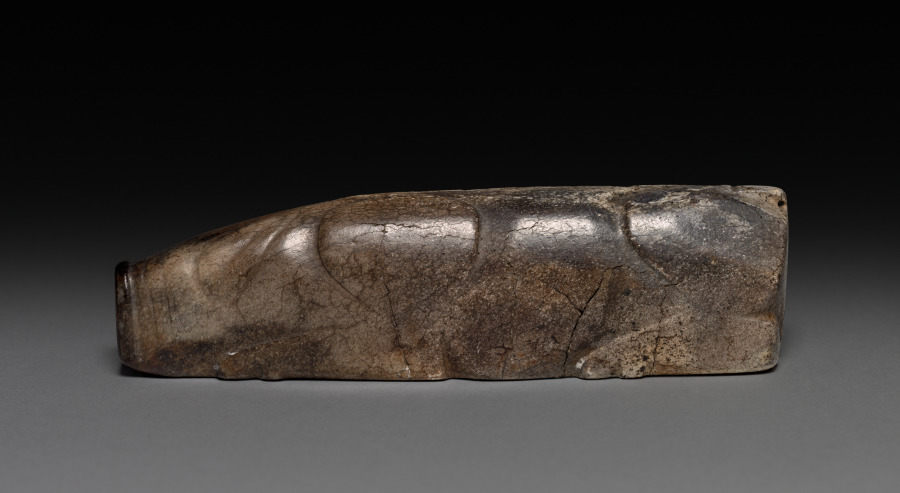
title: Pig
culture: China, Zhou dynasty (c. 1046–256 BCE)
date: 1045–256 BCE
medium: jade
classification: Jade